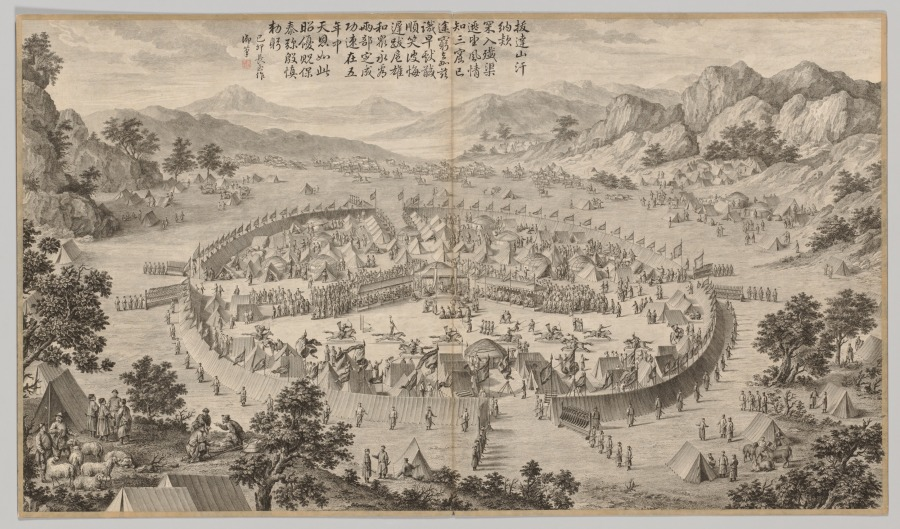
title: Khan of Bada Shan Presenting Tribute: from Battle Scenes of the Quelling of Rebellions in the Western Regions, with Imperial Poems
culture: China, Qing dynasty (1644–1911), Qianlong reign (1736–95)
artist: Jean Damascene Sallusti (Italian, d. 1781)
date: c. 1765–74; poem dated 1759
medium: etching, mounted in album form, 16 leaves plus two additional leaves of inscriptions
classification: Print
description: This set of etchings was commissioned by Emperor Qianlong to record in pictorial terms the courage of his generals and soldiers in quelling the rebellions in the Western Regions. Qianlong added his own poem to each of the etchings, indicating his appreciation and pride in this demonstration of military might. "Western Regions" refers to the present-day Xingjiang province, often described in Western writing as "Central Asia."